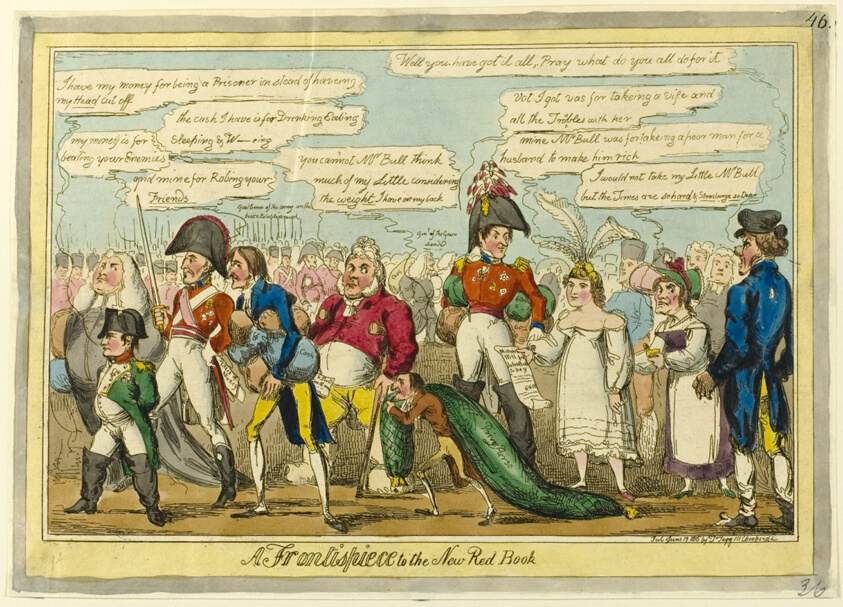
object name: Print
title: A Frontispiece to the New Red Book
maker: Attributed to William Heath (English, 1794-1840); published by Thomas Tegg (English, 1776-1845)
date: published June 13, 1816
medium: Hand-colored etching on ivory wove paper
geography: England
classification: etching; print; prints and drawing